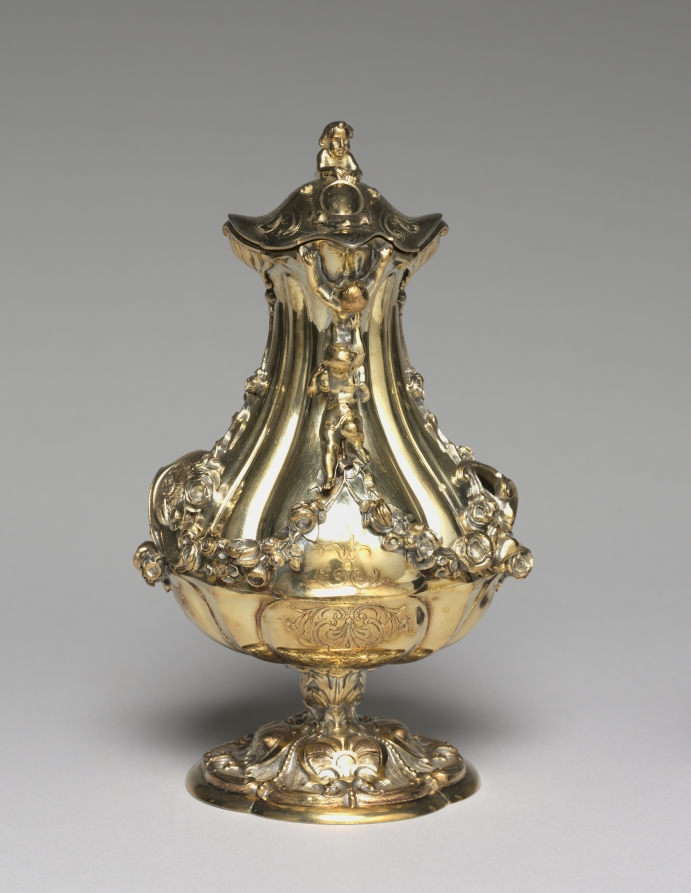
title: Covered Jug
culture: France, 19th century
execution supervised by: Jean-Valentin Morel (French, 1794–1860)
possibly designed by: Jules Dieterle (French, 1811–1889)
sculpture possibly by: Jules Klagmann (French, 1810–1867)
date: c. 1845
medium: gilded silver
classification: Silver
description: The elegance and richness of this ewer demonstrate the high level of technical mastery achieved by its maker. Morel studied under his father, a Parisian lapidary (someone who cuts, polishes, and engraves hard stones), and with Adrien Vachette, a maker of gold boxes. In 1842 he went into partnership with Charles-Edmond Duponchel, which lasted until the late 1840s, at which time he established himself in London, remaining there until 1852, when he returned to Paris. Morel frequentlyfollowed the designs of others, and it has been suggested that in the case of this pitcher his well-known contemporary, Jules Dieterle (1811-1889), may have conceived the overall form. The female figure seems to have been based on a design by the sculptor Jules Klagmann (1810-1867).